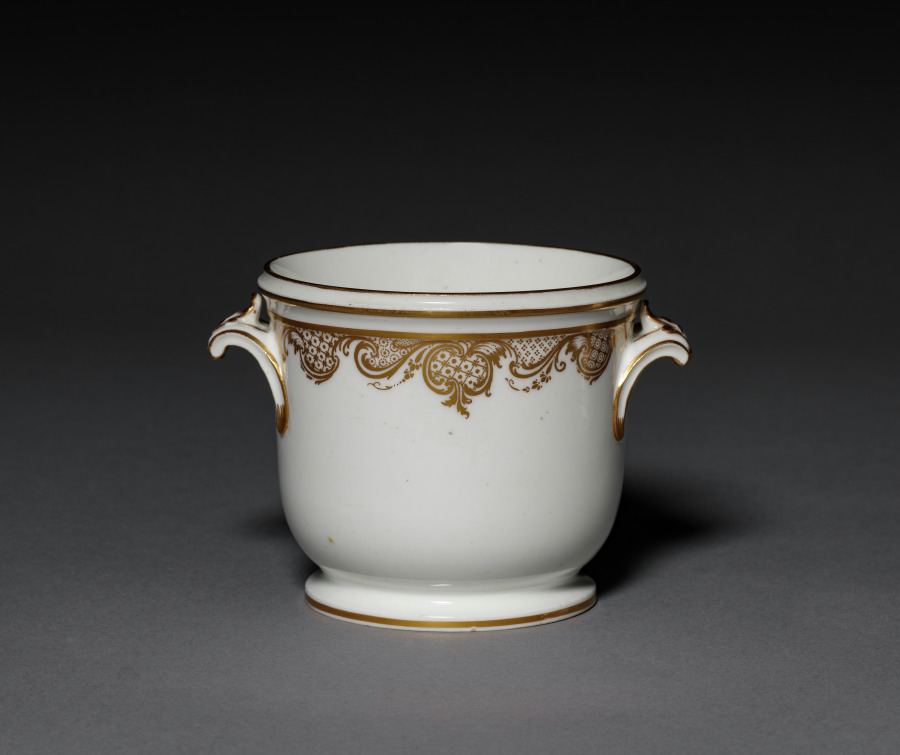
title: Flower Pot (1 of 2)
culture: France, Vincennes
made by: Vincennes Porcelain Factory (France, 1740–56)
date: 1745–53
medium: soft-paste porcelain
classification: Ceramic